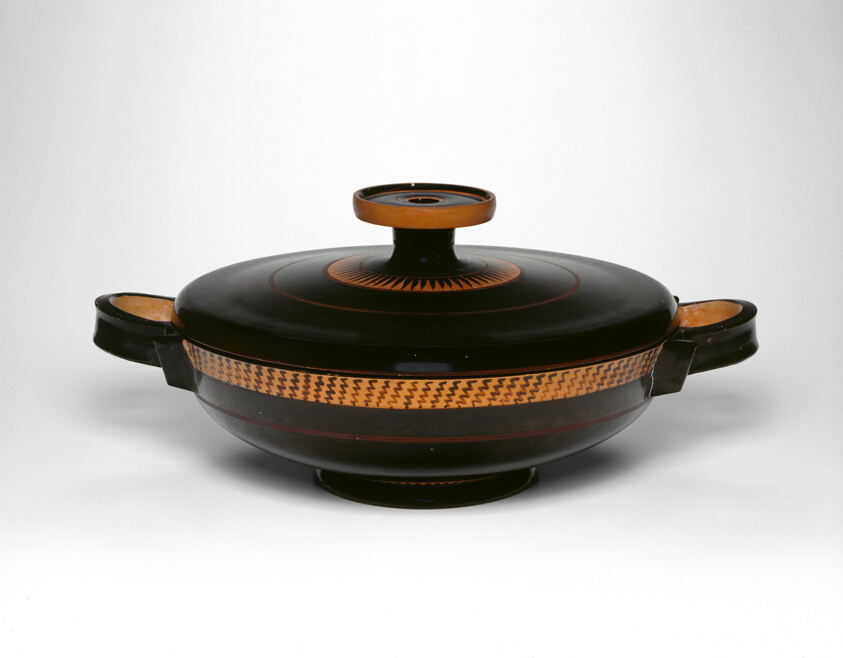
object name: Vessel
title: Lekanis (Covered Dish)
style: greek, ancient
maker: Greek; Athens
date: 450-430 BCE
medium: terracotta, black-glaze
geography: Greece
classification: vessel; ancient art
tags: writing